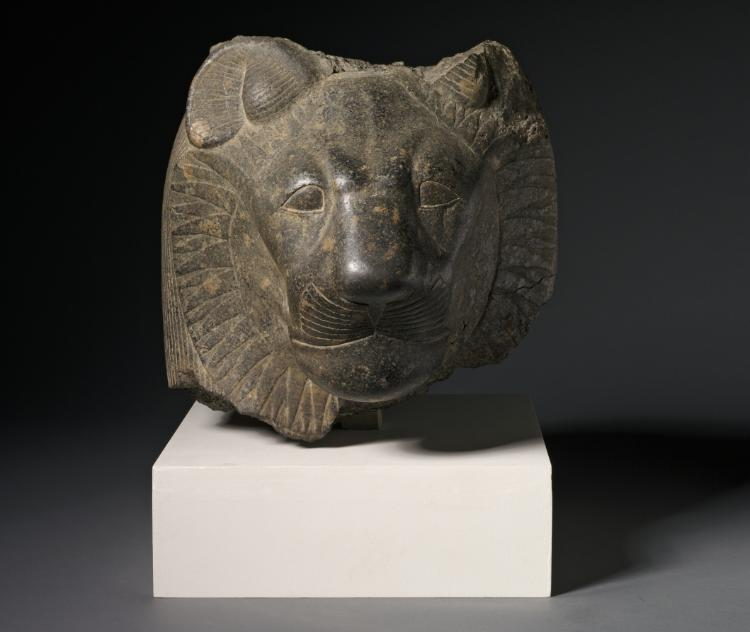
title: Head of Sekhmet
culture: Egypt, Thebes(?), New Kingdom (1540–1069 BCE), Dynasty 18, reign of Amenhotep III (1390–1352 BCE)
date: c. 1391–1353 BCE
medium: granodiorite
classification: Sculpture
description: This lioness head once belonged to a grand statue of the goddess Sekhmet, "the powerful one," probably seated and wearing a tight dress. Possibly appealing to her healing aspect, Pharaoh Amenhotep III, often described as “beloved of Sekhmet,” commissioned and dedicated hundreds of large granodiorite Sekhmet sculptures in his Theban mortuary temple. Thus, this head likely comes from Thebes, perhaps later moved across the Nile—like many such sculptures—to the temple of Mut, a related deity, at Karnak. Behind her stylized ruff, Sekhmet wears a wig, once crowned with a sun disk and uraeus, the stylized cobra symbolizing royal or divine power.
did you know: Amenhotep III may have dedicated 730 statues of Sekhmet, two for each day of the year.